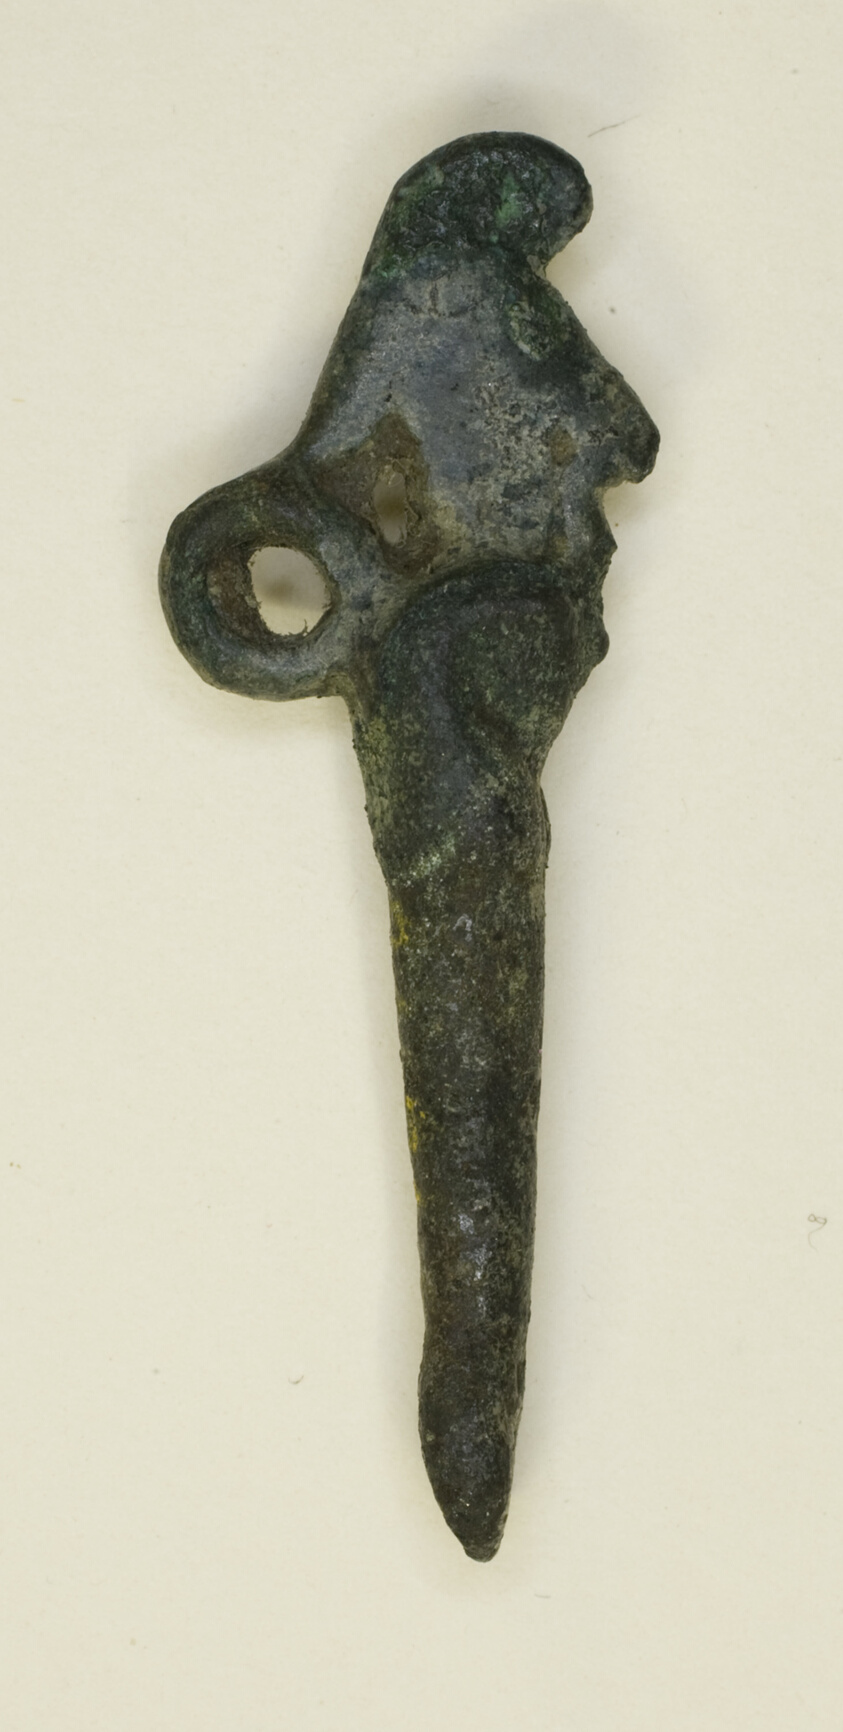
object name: Costume and Accessories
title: Amulet of the Harpoon of Horus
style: egyptian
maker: Egyptian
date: Third Intermediate–Late Period (about 1070–332 BCE)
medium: Bronze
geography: Egypt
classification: amulet; jewelry; bronze; metal; ancient art; costume